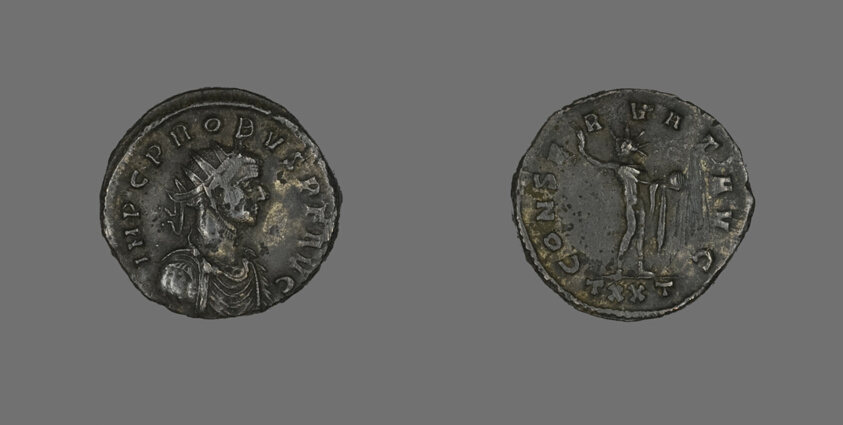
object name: Coin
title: Coin Portraying Emperor Probus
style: imperial (roman), ancient, roman (ancient, style or period)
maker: Roman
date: 277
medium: Bronze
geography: Roman Empire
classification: coin; ancient art